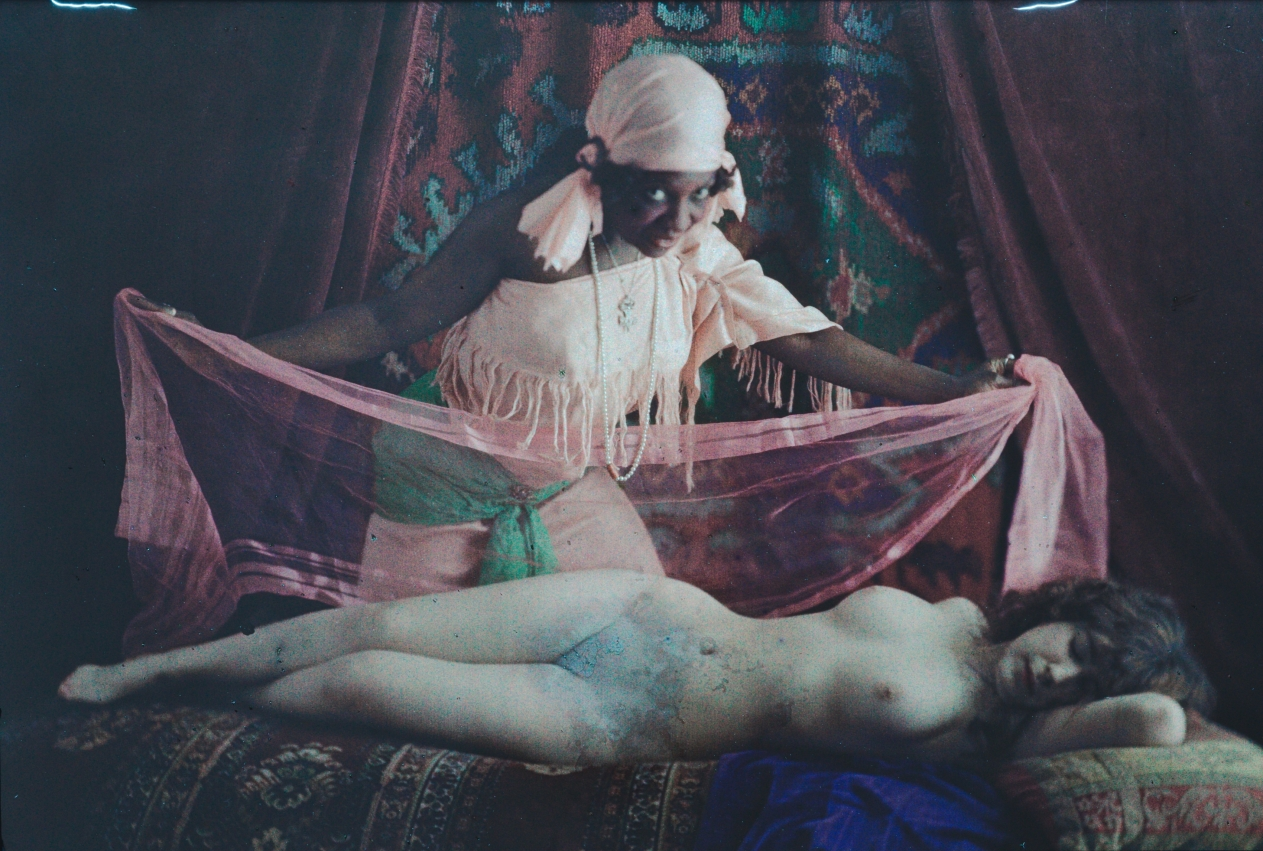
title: Reclining Nude with Slave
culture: France, 20th century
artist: Marcel Meys (French)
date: c.1905–1910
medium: full plate autochrome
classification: Photograph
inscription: On the recto side of glass plate, there is an adhesive label , written in dark blue marker on it is : " 3".